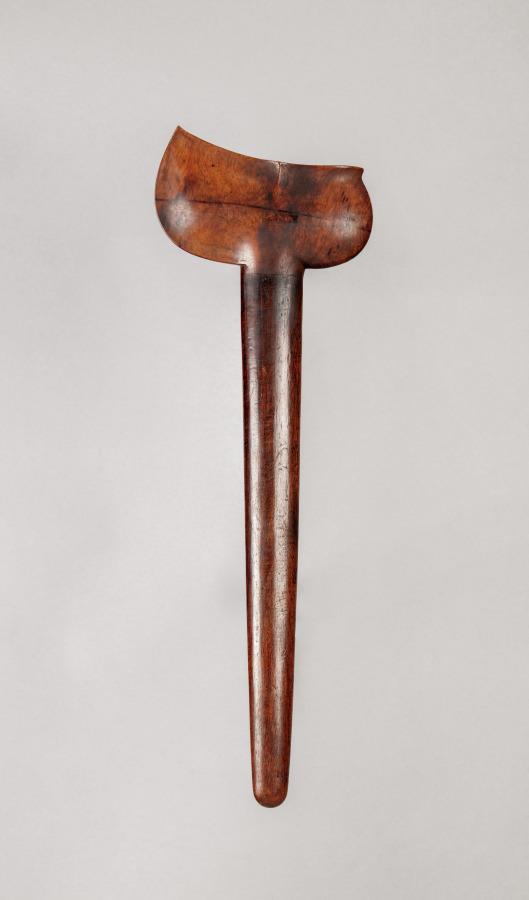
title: Scabbard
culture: Java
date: 1800s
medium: wood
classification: Arms and Armor